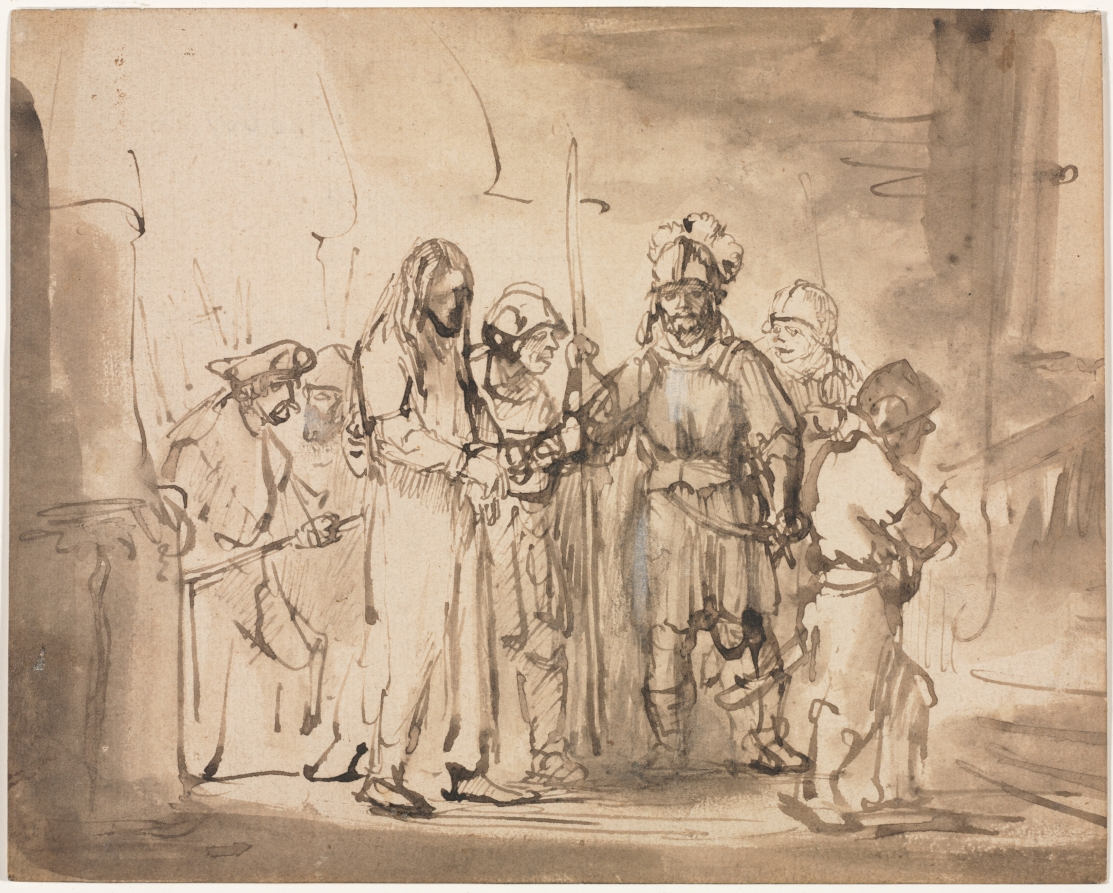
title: Christ Taken before Caiaphas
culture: Netherlands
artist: studio of Rembrandt van Rijn (Dutch, 1606–1669)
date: c. 1641–42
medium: pen and brown ink and brush and brown wash, with white gouache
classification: Drawing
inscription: VERSO, through transmitted light, upper right, in ink(?): [illegible] / [6601?] ; VERSO OF SECONDARY SUPPORT, upper left, in graphite: HJH [first two letters crossed out] ; upper center, in graphite: Rembrandt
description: The first drawing purchased by the museum as a Rembrandt is now considered by experts to have been made by a follower of the Dutch artist. The scene depicts Christ being led to his first interrogation after his capture in Gethsemane (John 18:12–14), an unusual subject that may be paraphrasing the traditional portrayal of Christ carrying the cross. Here, the exhausted figure of Christ, contrasted with the brutal features and cruel gestures of the soldiers, produces an image that resonates with emotion. However, stylistic details, particularly the use of wash that creates a vague space and the lack of clarity and directness in Christ's face, suggest that this drawing was executed by a student or follower working in Rembrandt's style.